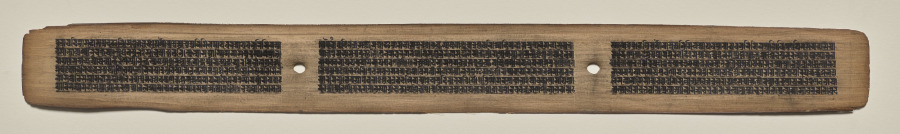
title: Text, Folio 76 (recto), from a Manuscript of the Perfection of Wisdom in Eight Thousand Lines (Ashtasahasrika Prajnaparamita-sutra)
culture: Eastern India, Bihar, Vikramashila Monastery. Painting: Nepal, Kathmandu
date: Sunday, September 14, 1119 (year 239 of the Newar Samvat in the month of Ashvina)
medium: gum tempera and ink on palm leaves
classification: Painting